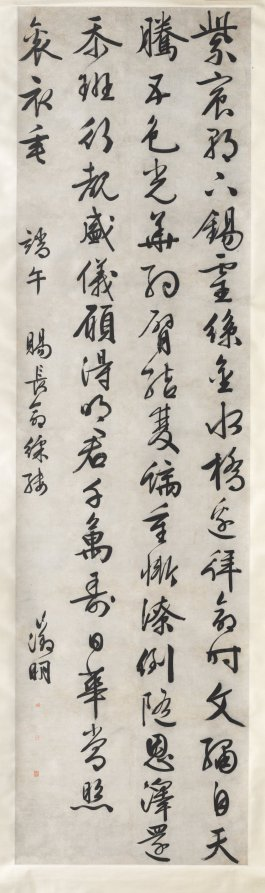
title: Poem on Imperial Gift of an Embroidered Silk: Calligraphy in Running-Standard Script (xingkaishu)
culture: China, Suzhou, Ming dynasty (1368-1644)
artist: Wen Zhengming (Chinese, 1470–1559)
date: c. 1525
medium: Hanging scroll; ink on paper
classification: Calligraphy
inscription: The text of the calligraphy, which is also included in Wen Zhengming's literary compilation, can be translated as follows: From the throne, this exquisite silk was bestowed on me,/ As I expressed my gratitude to His Majesty by the Goldwater Bridge./ This heavenly silk is embroidered with five colors./ Resplendent it is, draping over my arm with [designs of] twin dragons./ Having received such a gift, I [bowed] in shame over my lack of achievements./ Humbly I returned to my rank to observe the grand ceremony./ I wish His Majesty shall live on for myriad years,/ And the sun will always shine upon His trailing robe.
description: A poem by the influential Wen Zhengming from Suzhou in southeastern China expresses Wen’s gratitude to the Jiajing emperor (reigned 1522–67) for a gift of embroidered silk bestowed in appreciation of his commendable service. The elegant, well-composed, and energetically written large characters in deep black ink reflect the handwriting of a distinguished scholar-artist. Works of calligraphy by Wen of this large scale are rare. The poem reads: As I expressed my gratitude to His Majesty by the Goldwater Bridge. This heavenly silk is embroidered with five colors. Resplendent it is, draping over my arm with [designs of] twin dragons. Having received such a gift, I [bowed] in shame over my lack of achievements. Humbly I returned to my rank to observe the grand ceremony. I wish His Majesty shall live on for myriad years, And the sun will always shine upon His trailing robe.